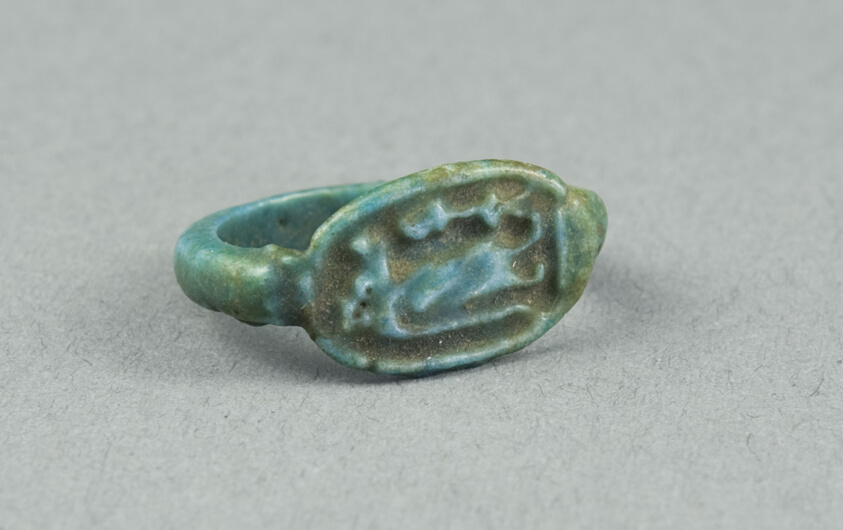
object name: Costume and Accessories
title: Ring: Figure of Tawaret (Thoeris), with sa (protection) sign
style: egyptian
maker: Egyptian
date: New Kingdom, Dynasty 18 (about 1390 BCE)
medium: Faience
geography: Egypt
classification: ring (jewelry); ceramics; jewelry; ancient art; costume; faïence (composite material)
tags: goddesses